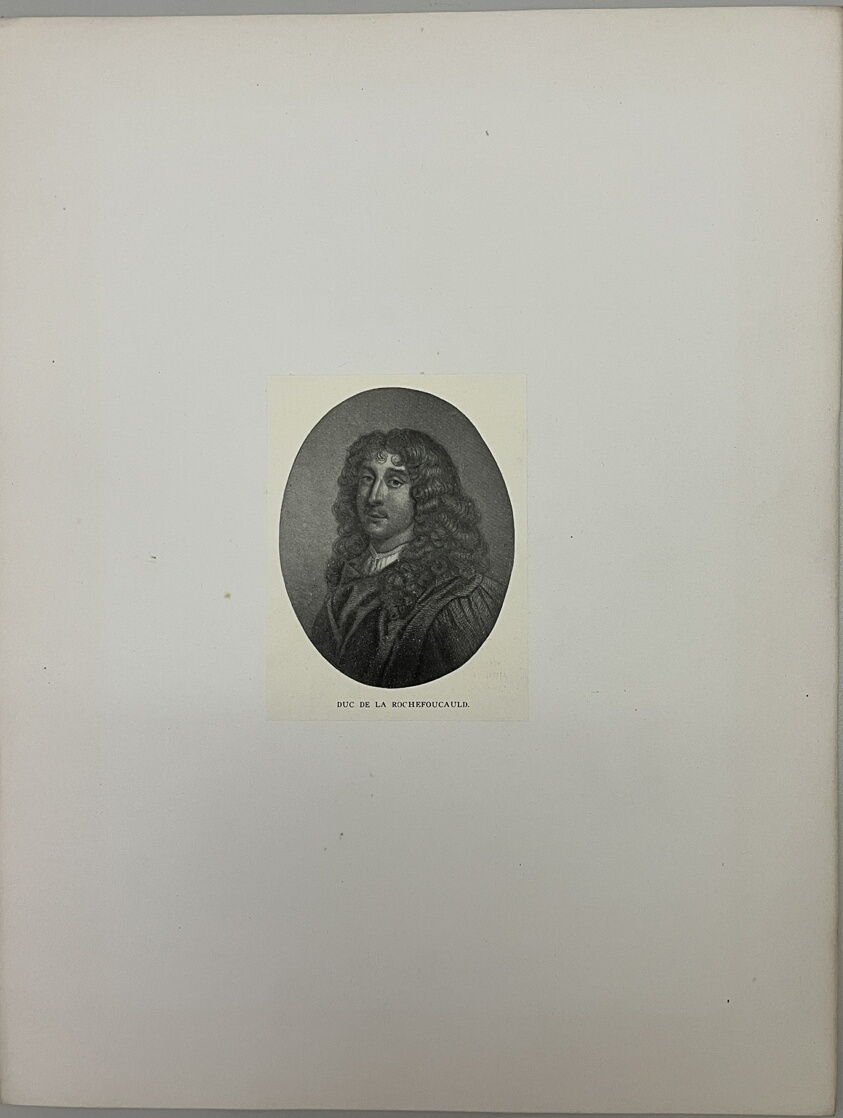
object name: Print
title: Duc de la Rochefoucauld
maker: Artist Unknown (Likely American or British, 19th century)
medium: Photolithograph on paper laid on paper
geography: United States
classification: reproduction; print; prints and drawing